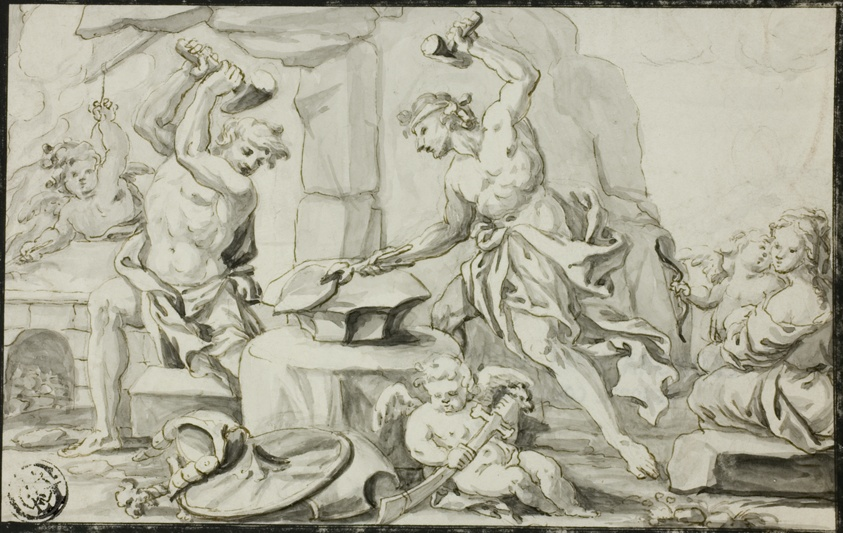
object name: Drawing and Watercolor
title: Vulcan Making Arms for Achilles, while Venus and Cupid Look On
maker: Abraham Drentwett, the elder (German, c. 1647-1727)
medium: Pen and brown ink with brush and gray wash, over traces of grahite, on vellum, tipped onto ivory laid paper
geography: Germany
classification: pen and ink drawings; drawings (visual works); prints and drawing